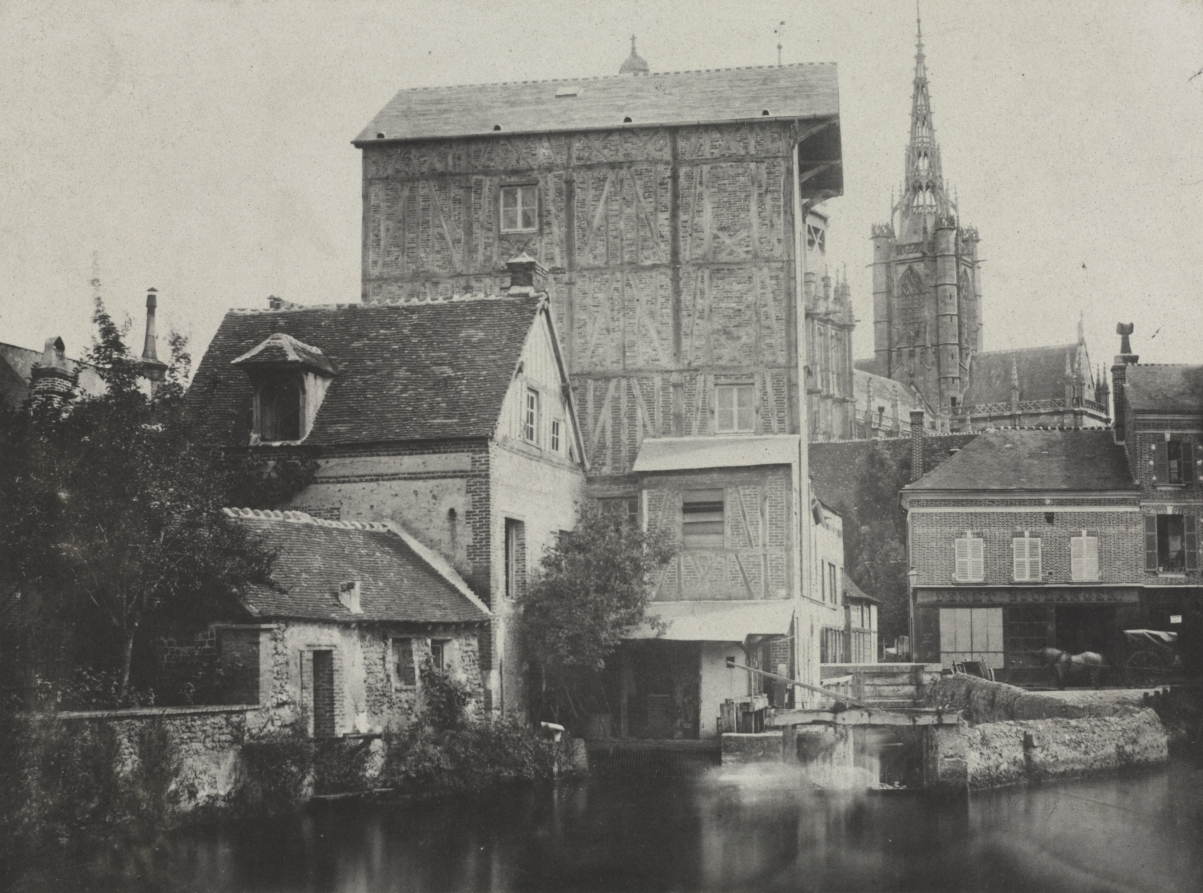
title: View of Évreux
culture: France, 19th century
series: Souvenirs photographiques, pl. 15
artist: Hippolyte Bayard (French, 1801–1887)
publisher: Blanquart-Évrard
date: 1850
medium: salted paper print from waxed paper negative, Blanquart-Évrard process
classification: Photograph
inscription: Written in black ink [faded] on recto: "48"; printed in black ink on recto: "H. BAYARD, PHOT. PL. 15 BLANQUART-ÉVRARD, ÉDITEUR / VUE PRISE À ÉVREUX / SOUVENIRS PHOTOGRAPHIQUES IMPRIMERIE PHOTOGRAPHIQUE_Blanquart-Evrard, à Lille."